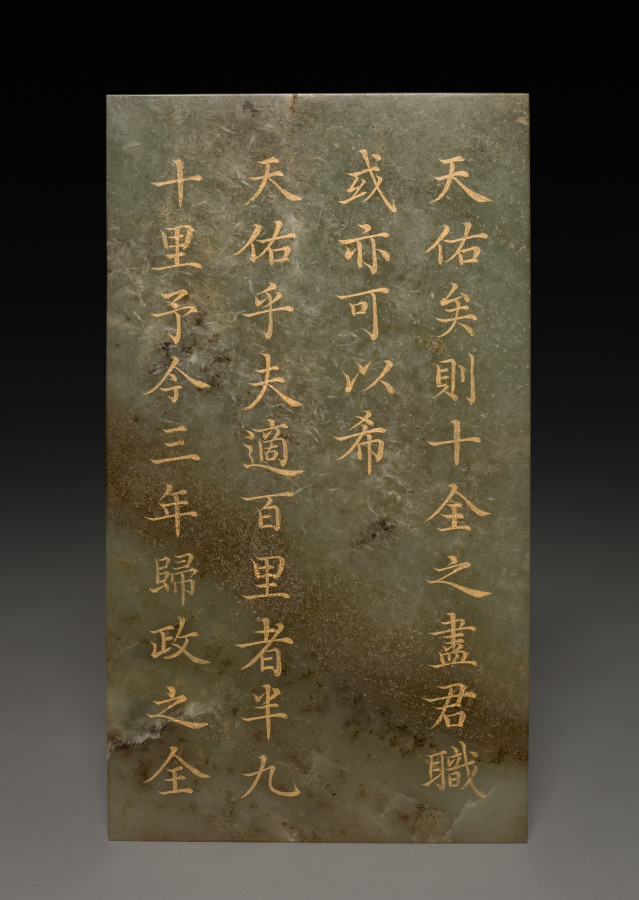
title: Tablet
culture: China, Qing dynasty (1644–1911), Qianlong reign (1736–95)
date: 1778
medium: jade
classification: Jade